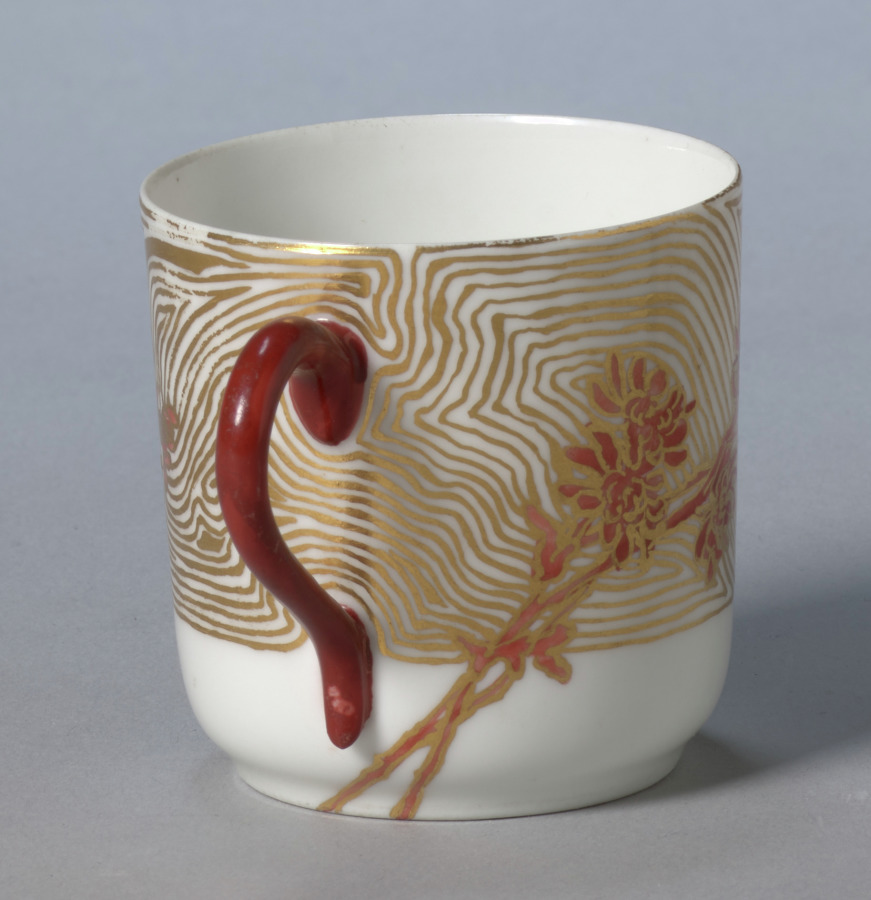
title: Cup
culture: America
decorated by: M. Louise McLaughlin (American, 1847–1939)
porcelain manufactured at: Haviland & Co. (French)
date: 1888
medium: porcelain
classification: Ceramic